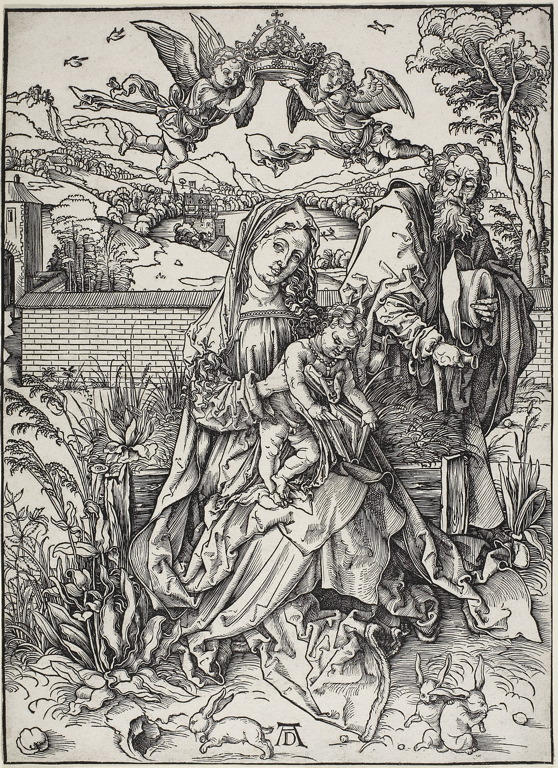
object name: Print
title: The Holy Family with Three Hares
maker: Albrecht Dürer (German, 1471-1528)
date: c. 1496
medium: Woodcut in black on off-white laid paper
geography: Germany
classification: woodcut; print; prints and drawing; paper